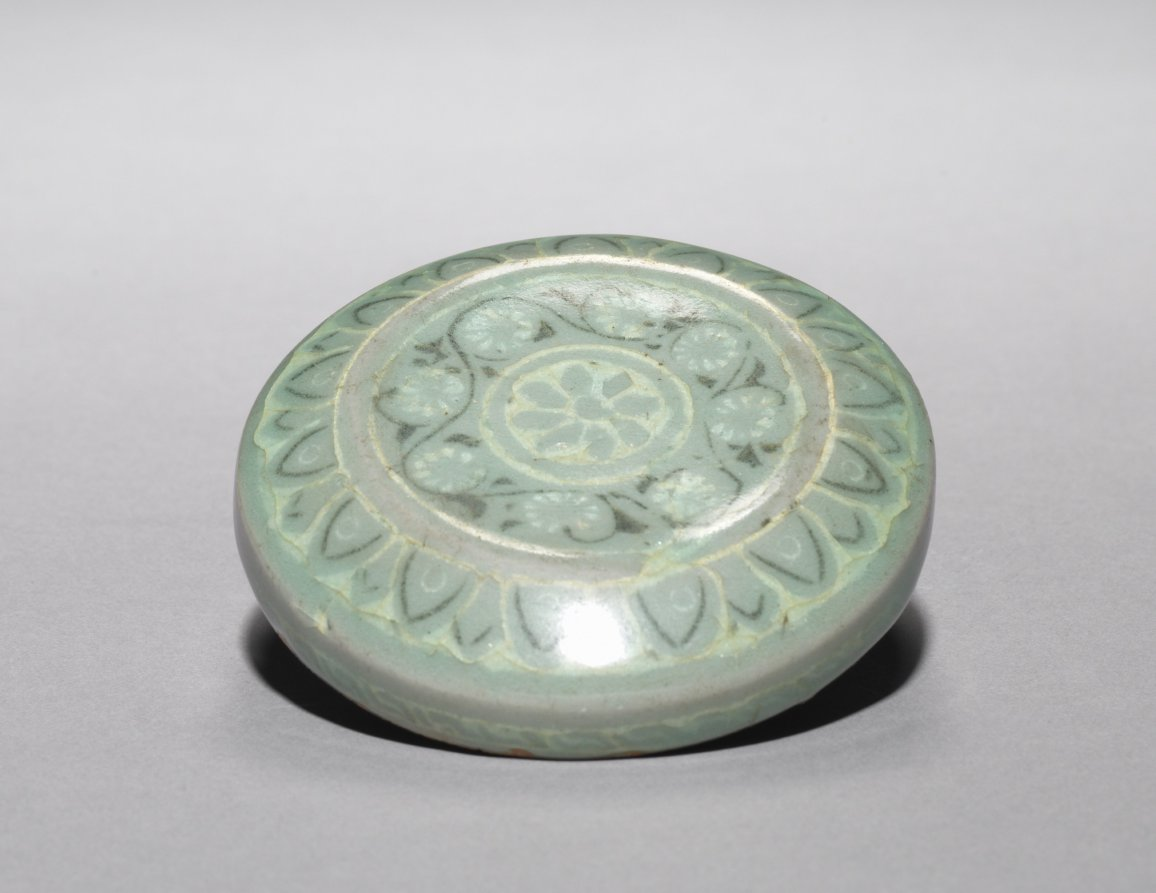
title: Box and Cover with Inlaid Chrysanthemum Design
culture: Korea, Goryeo dynasty (918–1392)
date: 1200s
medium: celadon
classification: Ceramic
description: Celadons, spoons, seals, and bronze mirrors were the most common burial objects in tombs during the Goryeo period (918-1392). Once used to contain color powder, rouge and eyebrow gel for makeup, this small container was one of the standard goods that furnished elites' tombs. Goryeo-period women and men used the grain powder of rice or millet for whitening their skin, safflower extract for rouge, and plant ash or soot for eyebrow gel. Yet, natural-looking make-up seems to have been the most favorable one in Korea according to the travelogue by Xu Jing (1091-1153), the Chinese diplomat who visited Korea in 1123.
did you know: This ceramic container was used to store incense or cosmetics.